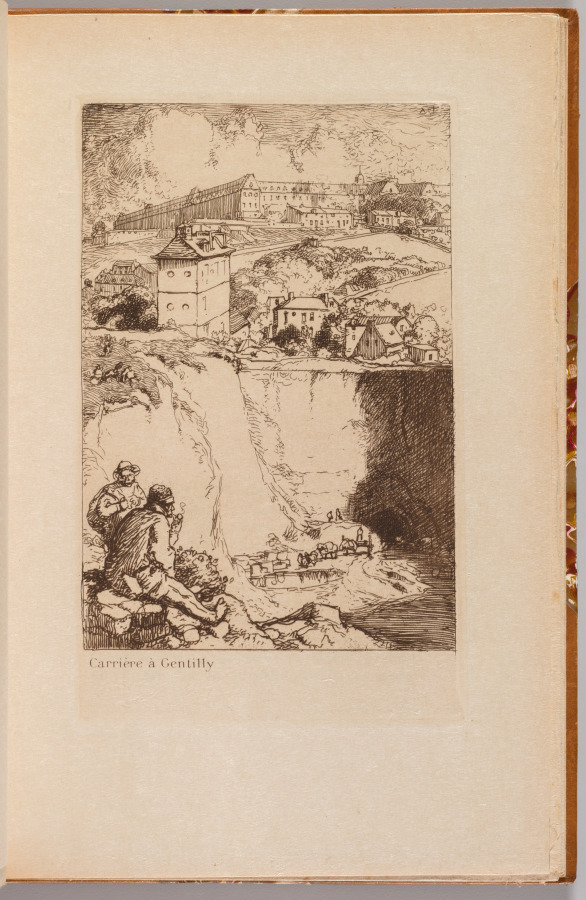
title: Catalogue de L'Exposition de August Lepère: Carrière à Gentilly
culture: France, 20th century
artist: Auguste Louis Lepère (French, 1849–1918)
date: 1908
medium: Etching, from leather-bound volume containing two etchings and one lithograph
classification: Bound Volume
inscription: In plate, below image, lower left: Carrière à Gentilly